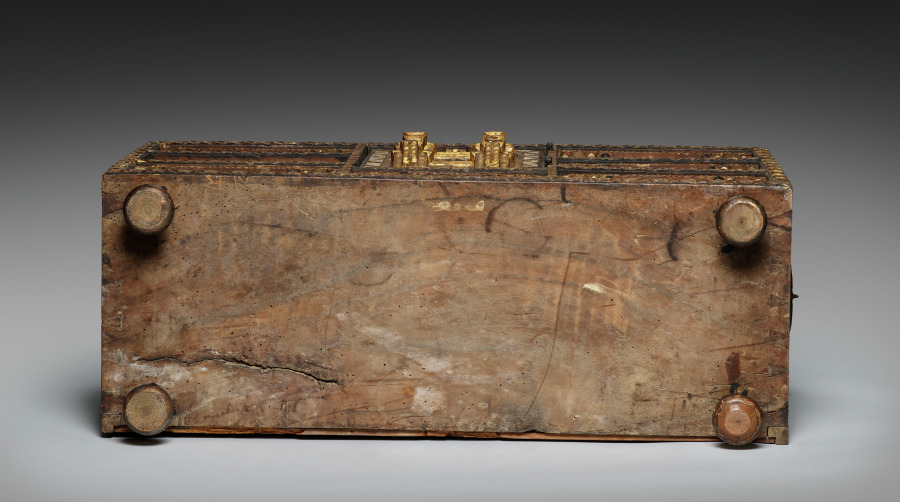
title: Chest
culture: Spain, Colonial, late 17th Century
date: late 1600s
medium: turned and joined wood, gilded and painted red with applied bone columns and bone inlays, wrought iron hardward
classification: Furniture and woodwork